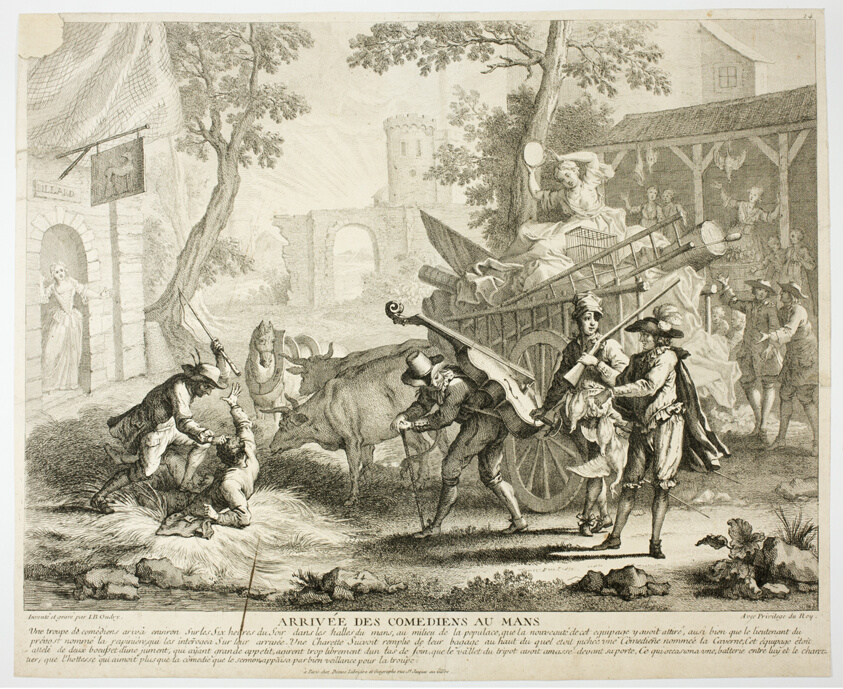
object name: Print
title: Arrival of the Comedians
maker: Jean-Baptiste Oudry (French, 1686-1755)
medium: Etching on paper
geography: France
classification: etching; print; prints and drawing